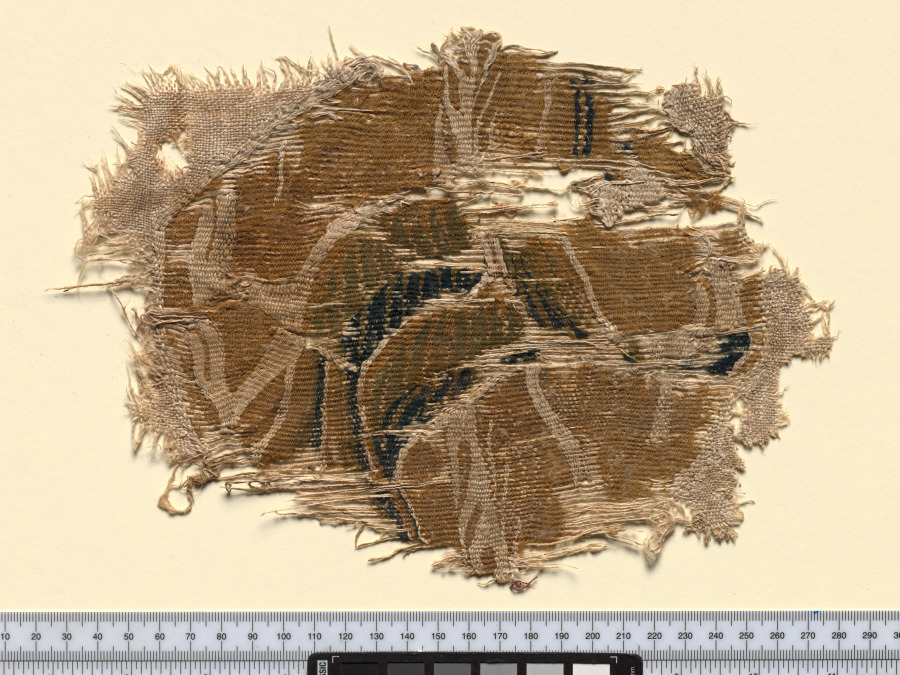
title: Fragments from a Hanging (?)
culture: Egypt, late Abbasid - early Tulunid period, 9th - 10th century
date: 800s - 900s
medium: tabby weave with inwoven tapestry ornament, linen and wool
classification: Textile